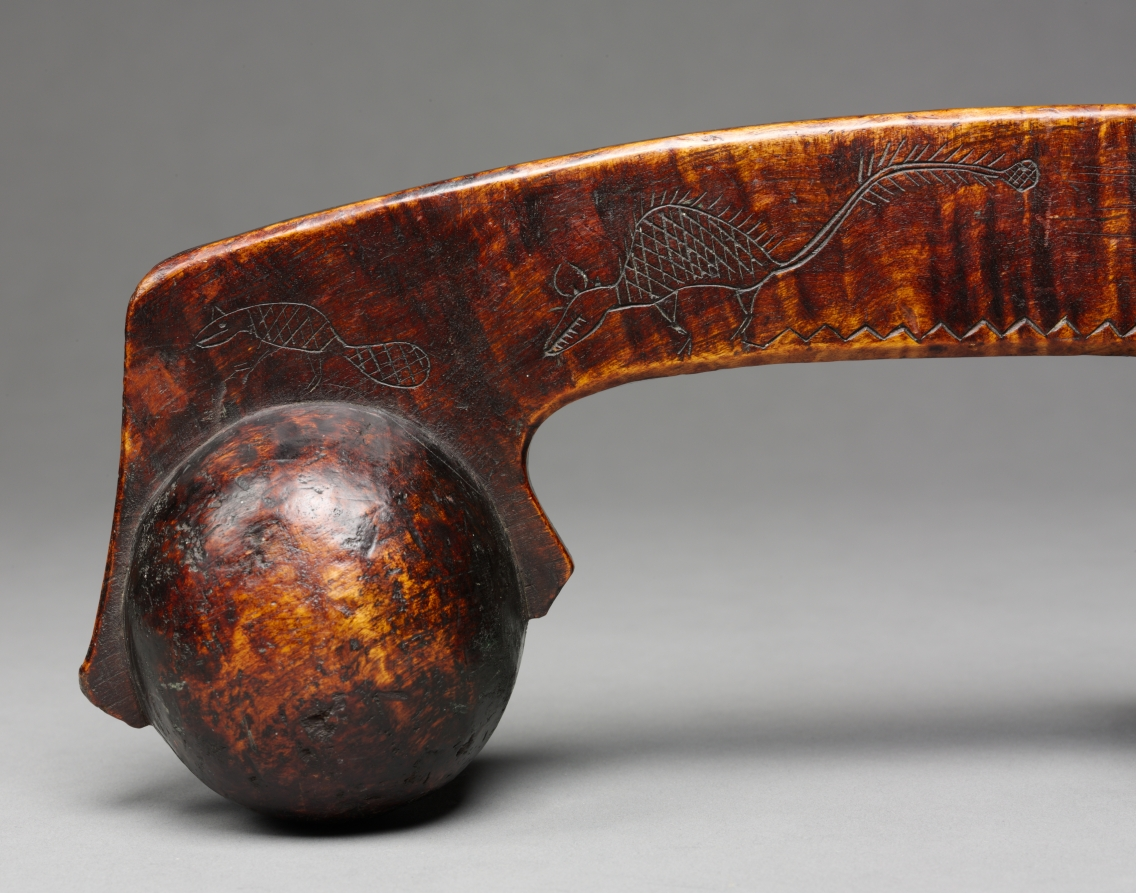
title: Ball-Headed War Club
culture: Native North America, Northeastern Woodlands, Great Lakes, Anishinaabe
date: late 1700s–early 1800s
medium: wood (maple?)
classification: Implements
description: The ball at the striking end of this club is clenched in an abstract, jawlike form that likely refers to a protector animal who endowed the owner with power. Incised on the shaft is a rich record of doodemag (singular, doodem, “totem”)—animals representing other-than-human progenitors from which Anishinaabe peoples trace their descent. (The Anishinaabeg, a group of related Great Lakes nations, include the Odawa, Ojibwe, Potawatomi, and others.) Included is an antlered creature, perhaps a caribou, along with mammals, birds, and powerful spirit beings: the thunderbird, its wings outstretched, and perhaps the long-tailed underwater panther. When this example was made, clubs had become symbols of status and earlier ways of life, having been replaced as favored weapons by metal tomahawks and European firearms. Today, clubs are part of powwow regalia.